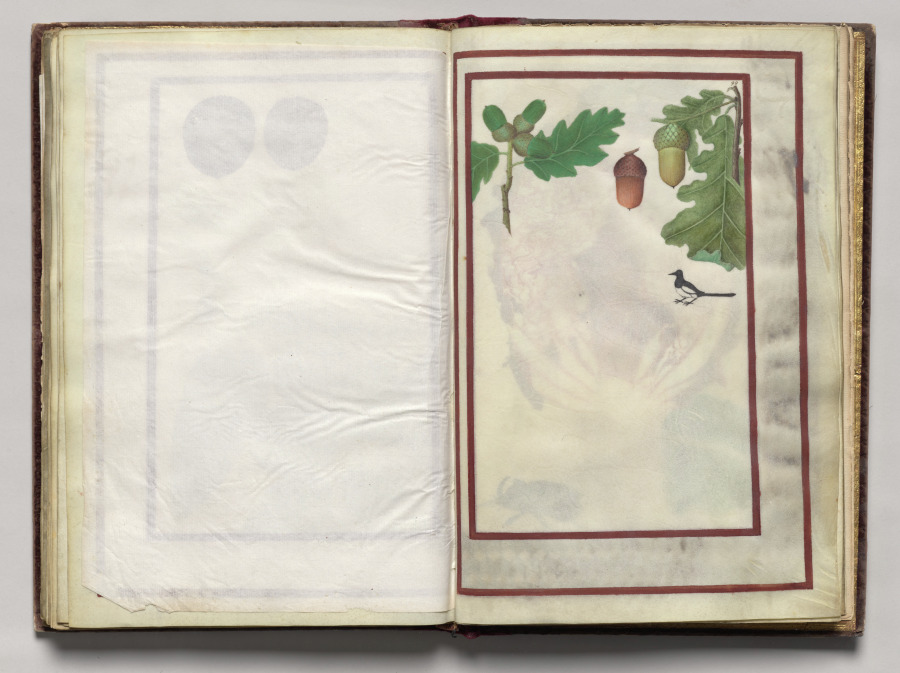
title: Oak Leaves, Acorns, and Bird, folio 44 (recto), from Florilegium (A Book of Flower Studies)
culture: France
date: 1608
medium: watercolor, ink, silver, and gold over occasional traces of pencil, on vellum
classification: Bound Volume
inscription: Dated: Poitiers 1608 (on frontispiece) Signed: On frontispiece in black ink, lower right: Van Kuyk Notation on drawing: Frontispiece: in pencil, lower margin: * élève de Van Kessel, peintre flammand (* in pencil also appears in front of Van Kuyk's name).